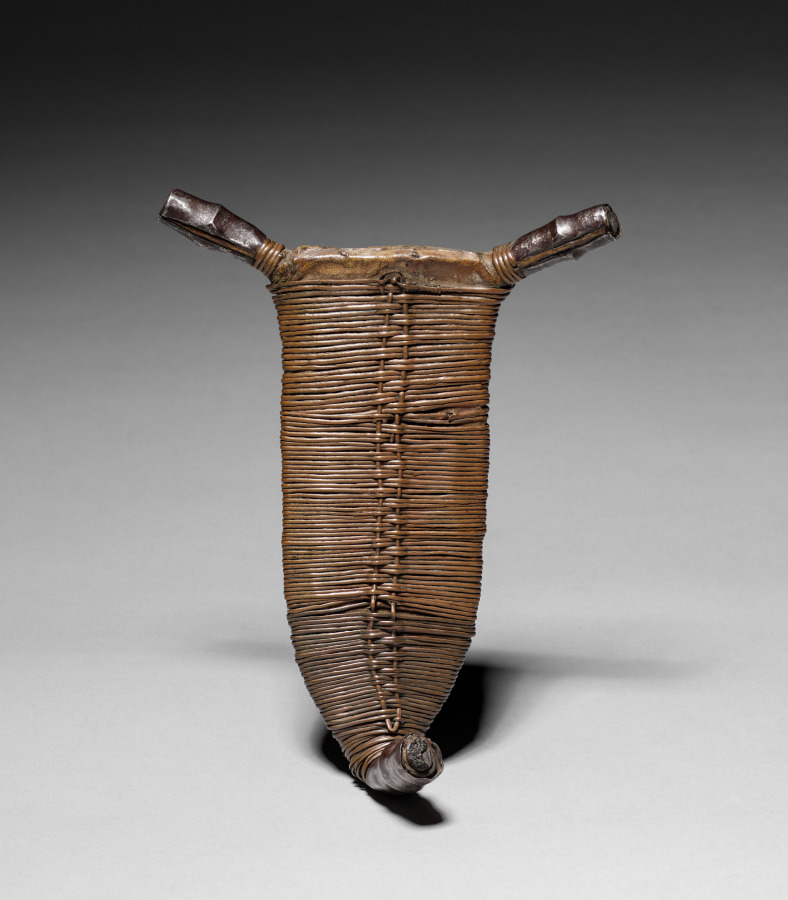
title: Sheath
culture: Africa, Central Africa, Democratic Republic of the Congo, Ngbandi-style maker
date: c. 1900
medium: Copper alloy and rawhide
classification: Arms and Armor